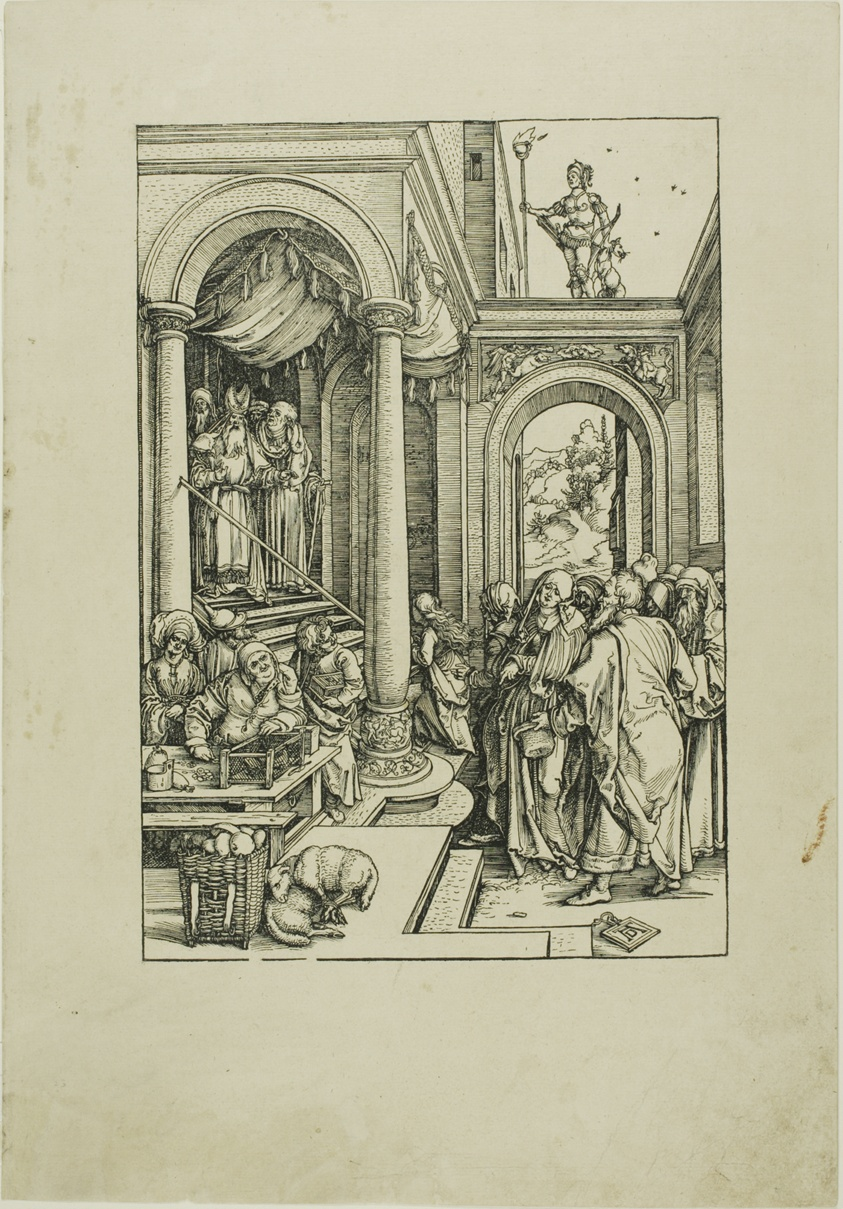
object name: Print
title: The Presentation of the Virgin in the Temple, from The Life of the Virgin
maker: Albrecht Dürer (German, 1471-1528)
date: c. 1503–04, published 1511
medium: Woodcut in black on tan laid paper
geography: Germany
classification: woodcut; print; prints and drawing; paper